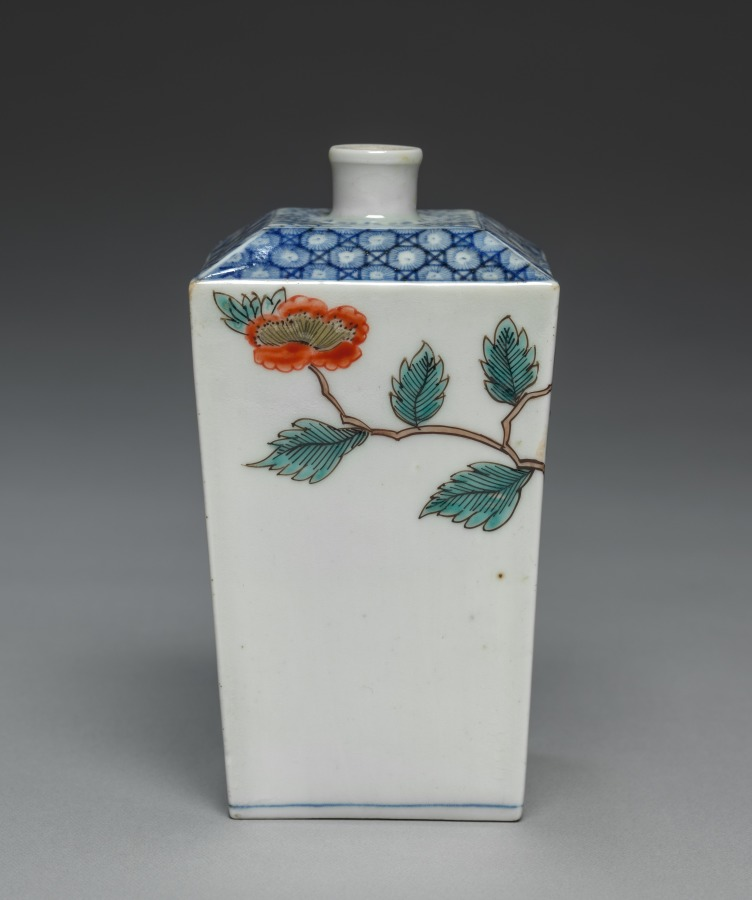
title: Bottle with Bird and Butterfly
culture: Japan, Edo period (1615–1868)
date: late 1600s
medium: porcelain with underglaze blue and overglaze color enamel and gold (Hizen ware, Ko-Imari type)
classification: Ceramic